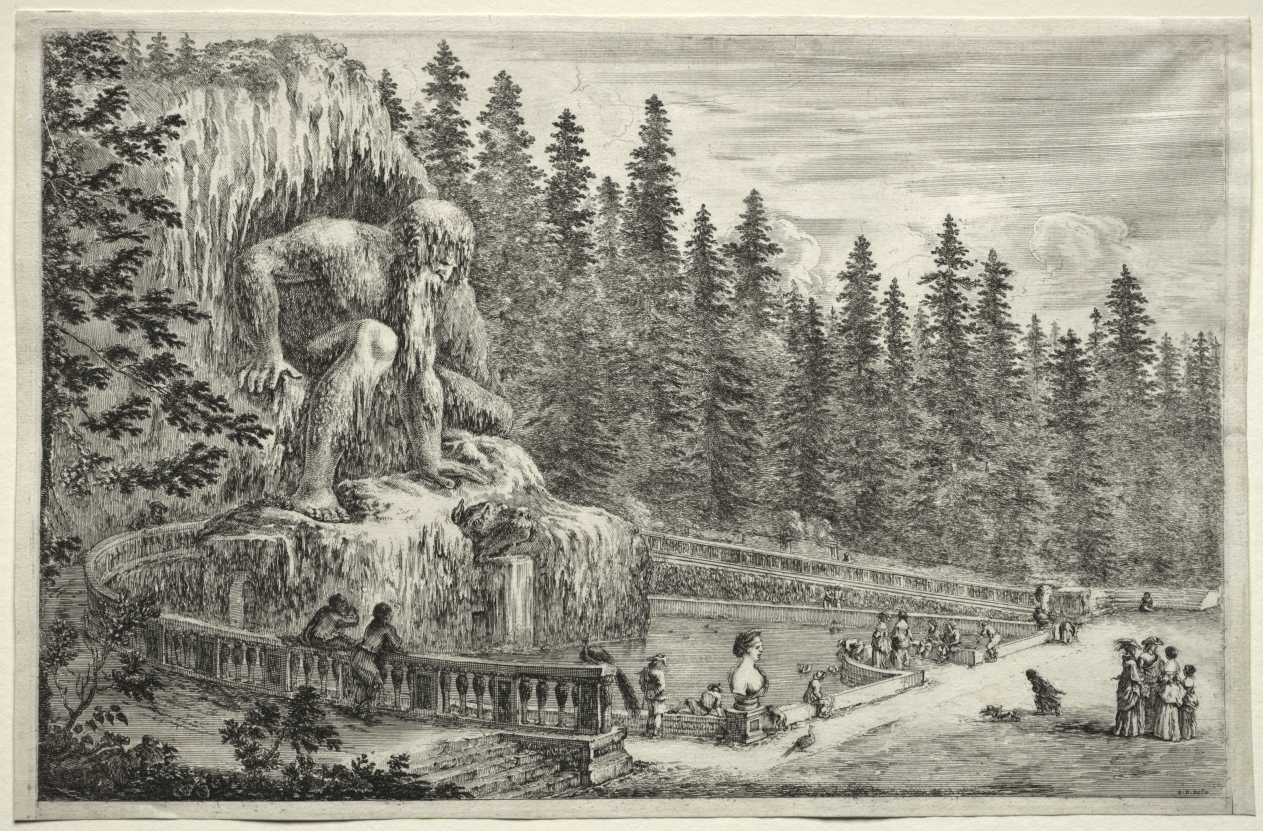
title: Views of the Villa of Pratolino: Colossal Statue of the Apennines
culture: Italy, 17th century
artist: Stefano Della Bella (Italian, 1610–1664)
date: c. 1653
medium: etching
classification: Print